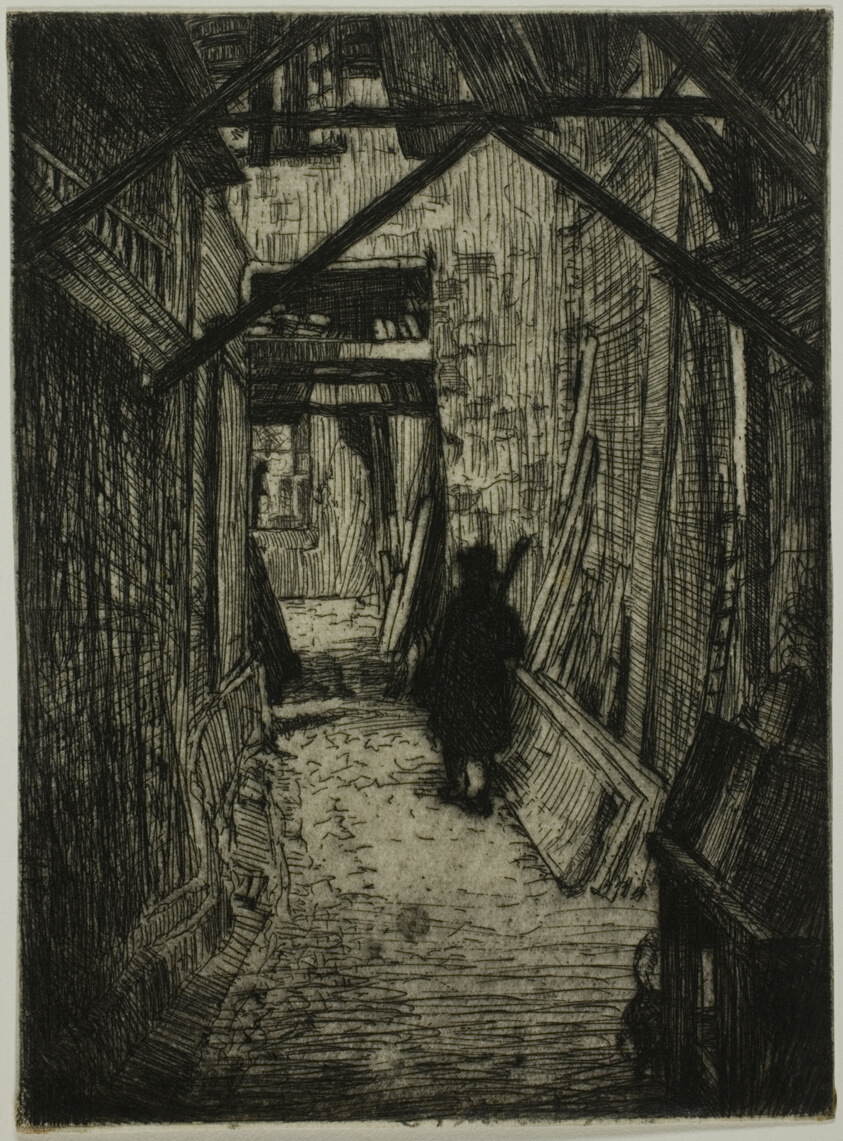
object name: Print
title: Passageway, Rouen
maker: Donald Shaw MacLaughlan (American, born Canada, 1876-1938)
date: 1899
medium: Etching in black on cream laid paper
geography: United States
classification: etching; print; prints and drawing